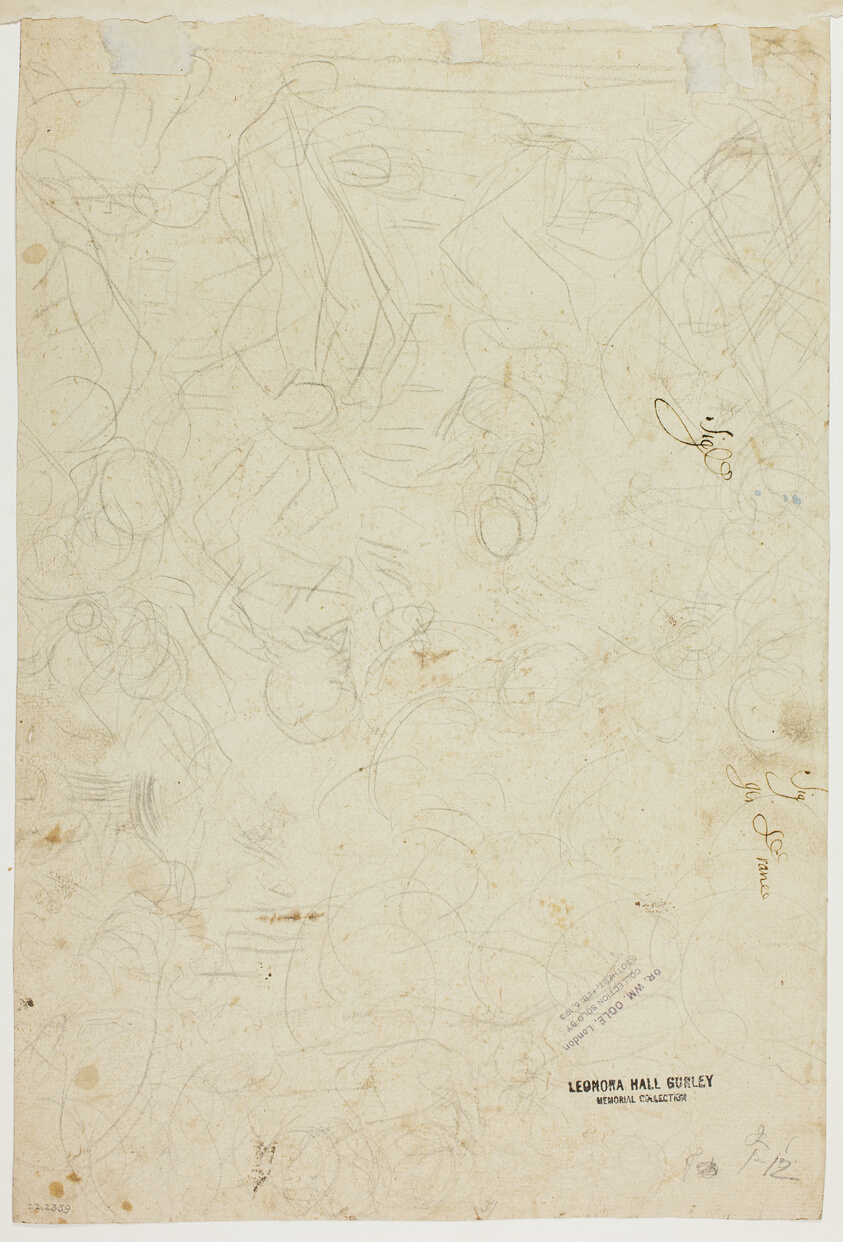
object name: Drawing and Watercolor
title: Sacrifice of Isaac (recto); Figure Sketches (verso)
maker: After Domenico Piola; Italian, 1627-1703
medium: Pen and brown ink, with brush and brown wash, over black chalk (recto) and black chalk (verso) on ivory laid paper, tipped onto tan wove paper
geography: Italy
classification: drawings (visual works); prints and drawing